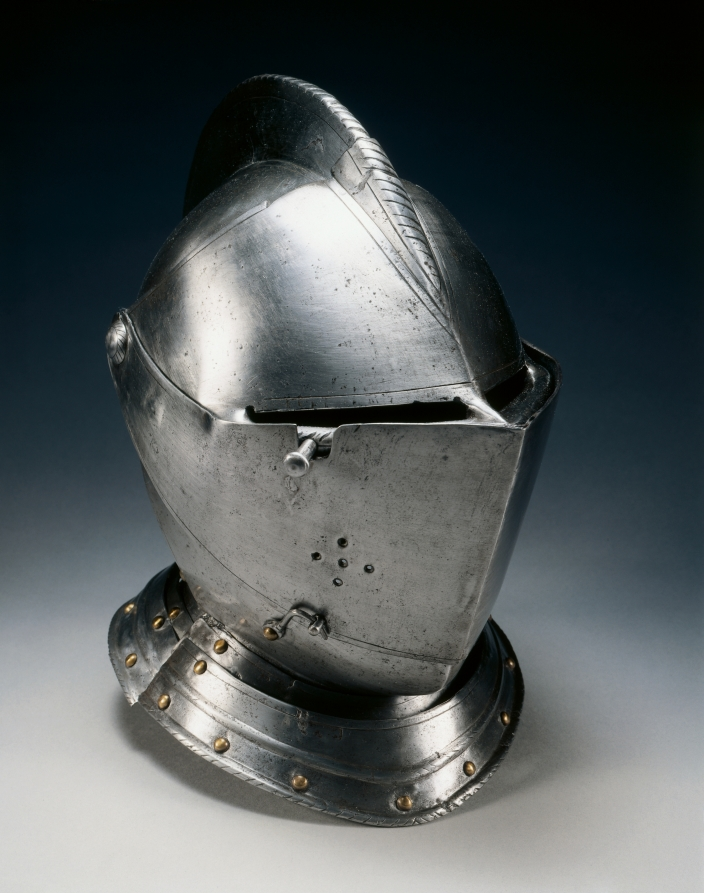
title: Close Helmet for the Field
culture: Germany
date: c.1550–70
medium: iron, steel, leather and brass rivets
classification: Arms and Armor